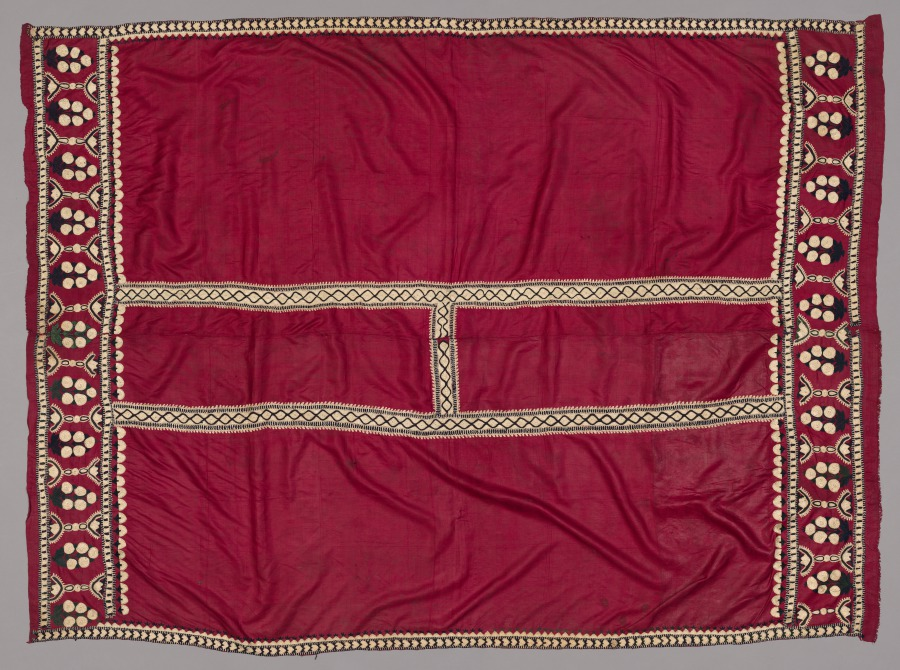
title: Shawl ("Cadar")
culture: Western India, Gujarat, Kachchh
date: 1800s–early 1900s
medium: silk thread on silk ground, embroidery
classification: Textile